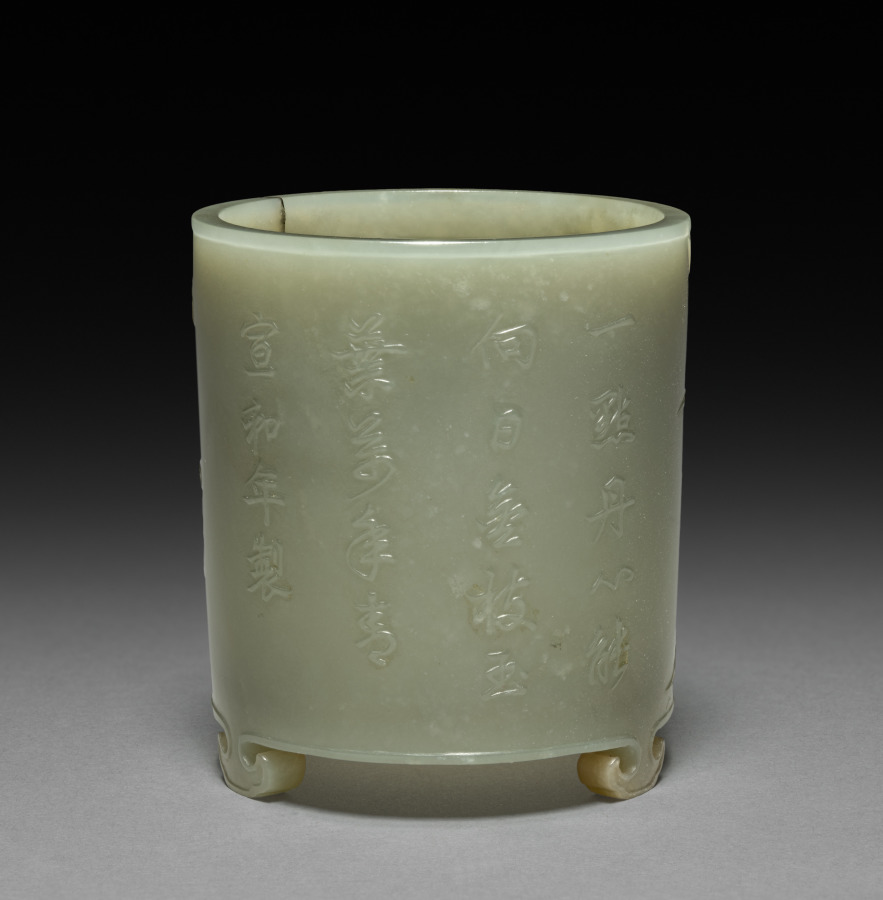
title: Cylindrical Container with Mallows and Inscription in Relief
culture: China, Qing dynasty (1644–1911), Qianlong reign (1736–95)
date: 1736–95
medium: white jade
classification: Jade